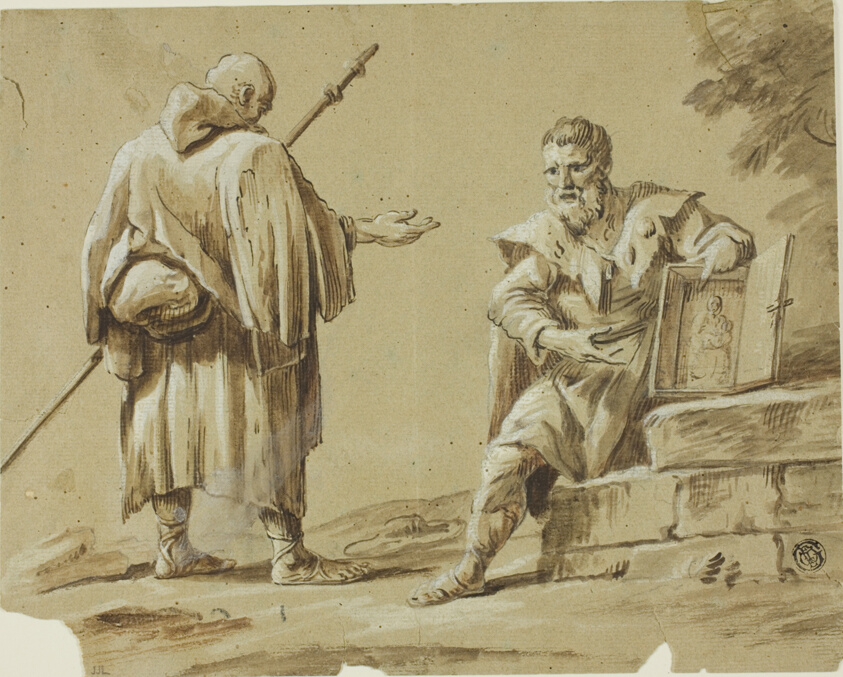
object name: Drawing and Watercolor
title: Two Pilgrims with Portable Shrine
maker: Tiberius Dominikus Wocher (Swiss, 1728-1799)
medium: Pen and brown ink, with brush and brown wash over graphite, heightened with white gouache, on greenish-gray laid paper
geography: Switzerland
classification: ink or chalk wash; drawings (visual works); prints and drawing